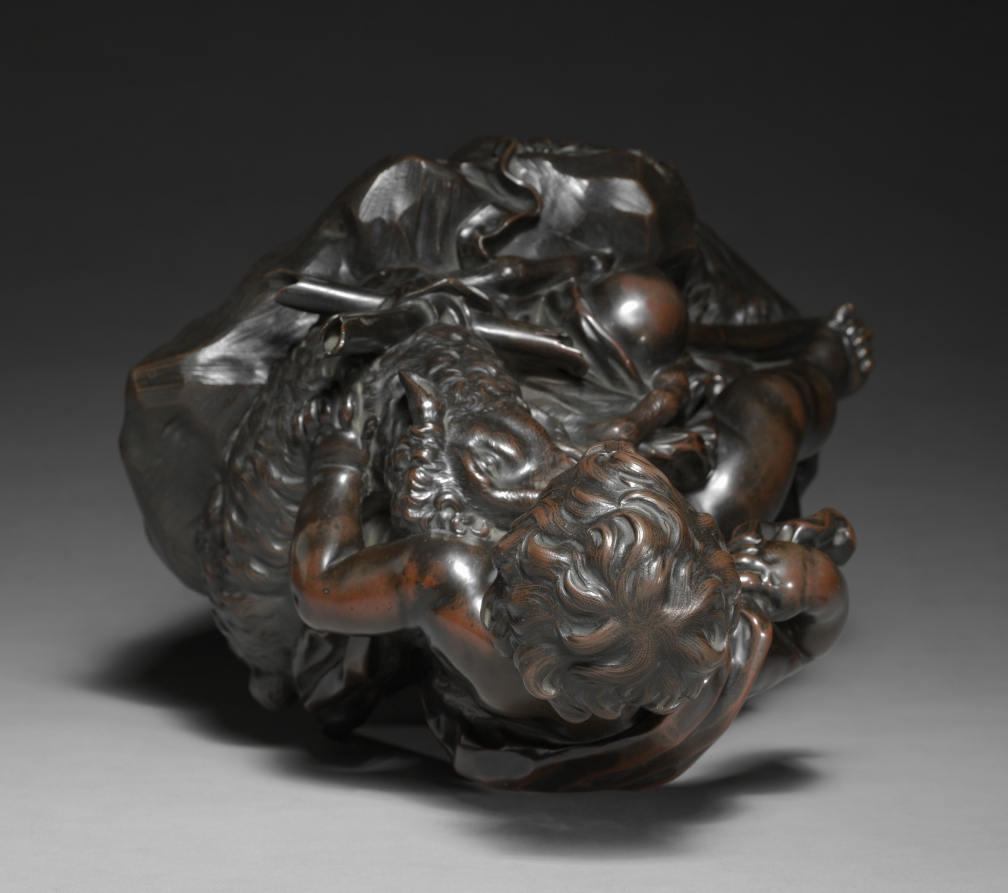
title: Young Saint John and the Lamb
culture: Italy, Florence, 17th century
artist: probably by Giuseppe Piamontini (Italian, 1664–1742)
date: c. 1680–1700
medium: bronze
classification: Sculpture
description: John the Baptist is often accompanied by a lamb as a sign of his intimacy with Christ, the Lamb of God. The depiction of children embracing animals is a motif from antiquity that Piamontini would have known.